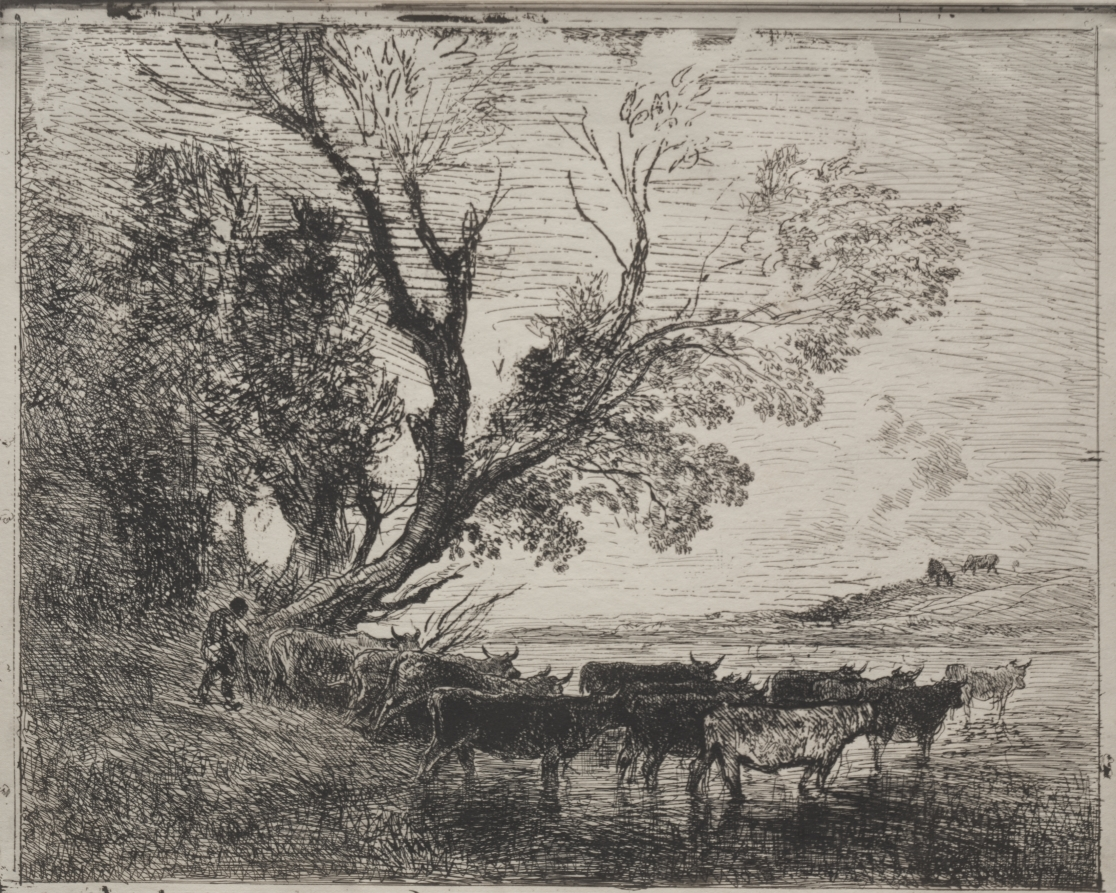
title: The Ford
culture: France, 19th century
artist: Charles François Daubigny (French, 1817–1878)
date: original impression 1862, printed in 1921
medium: cliché-verre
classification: Print